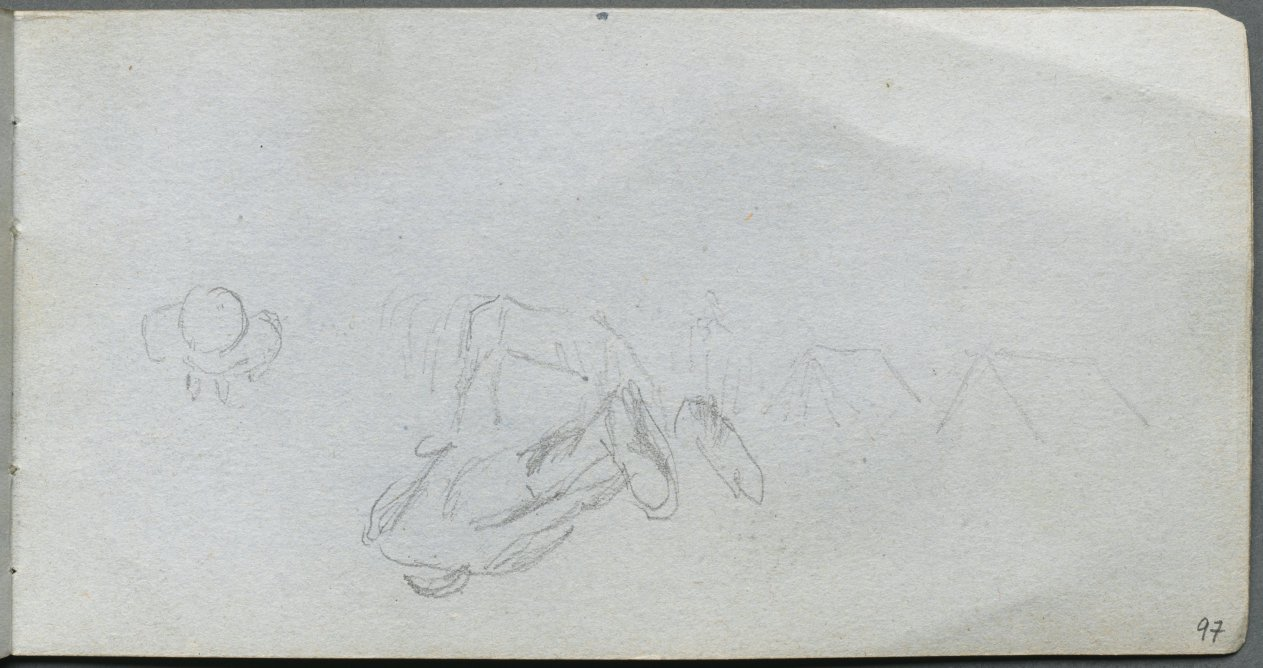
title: Sketchbook, page 97: Study of Figures, Buildings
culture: France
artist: Ernest Meissonier (French, 1815–1891)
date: c. 1860s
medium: graphite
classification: Bound Volume